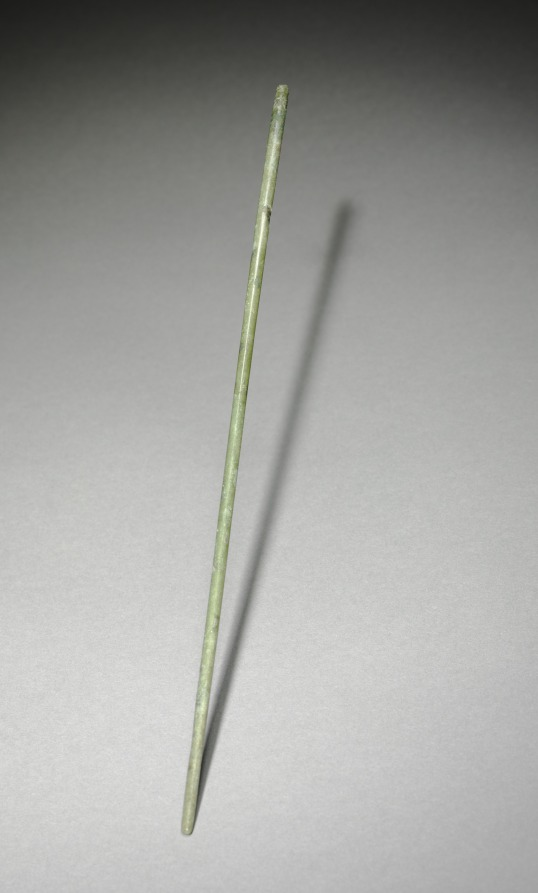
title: Chopstick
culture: Korea, Goryeo dynasty (918–1392)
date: 918–1392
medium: bronze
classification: Metalwork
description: In Korea, chopsticks made of metal such as brass, silver, and gold were excavated from ancient tombs and ruins dated to the 6th century at the earliest. Burial goods often include utilitarian objects such as table wares and utensils because the dead were believed to need them in the afterlife.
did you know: Nowadays Korean still prefer metal chopsticks (stainless steel and brass) to wooden ones.